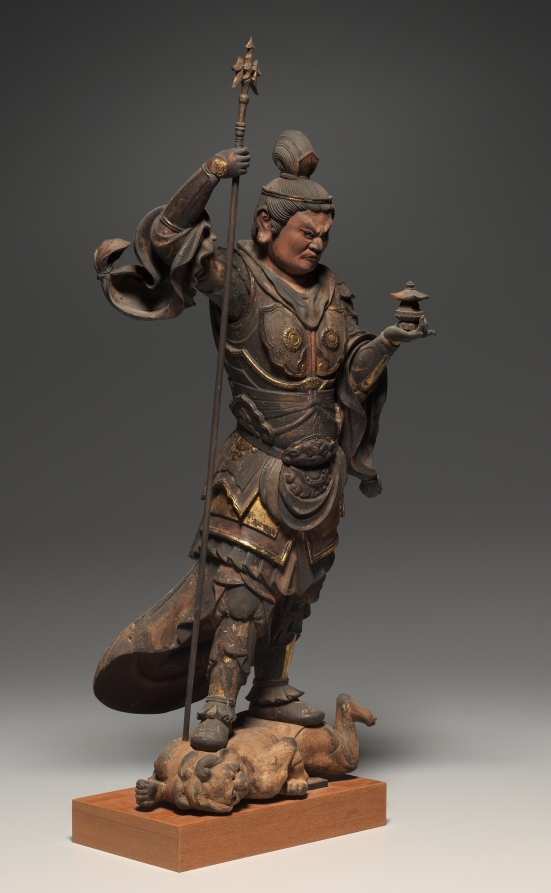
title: Guardian King of the North (Bishamonten)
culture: Japan, Kamakura period (1185–1333)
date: 1185–1333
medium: wood with gold polychromy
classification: Sculpture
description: In Buddhism, Bishamonten is one of four kings who protect the cardinal directions. He stands with a stupa symbolizing the Buddhist teachings and relics of the Buddha in the palm of his left hand, and a spear to foil the enemies of Buddhism in his right. He crushes a demon beneath his feet.